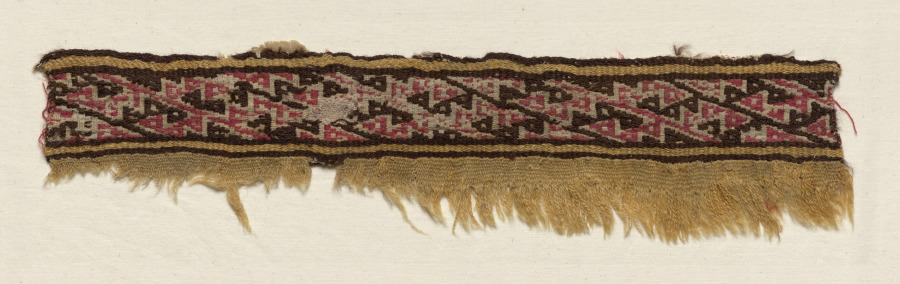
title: Four Border Strips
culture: Peru, Central Coast, Chancay, 12th-15th century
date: c. 1100–1400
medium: plain compound cloth; cotton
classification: Textile